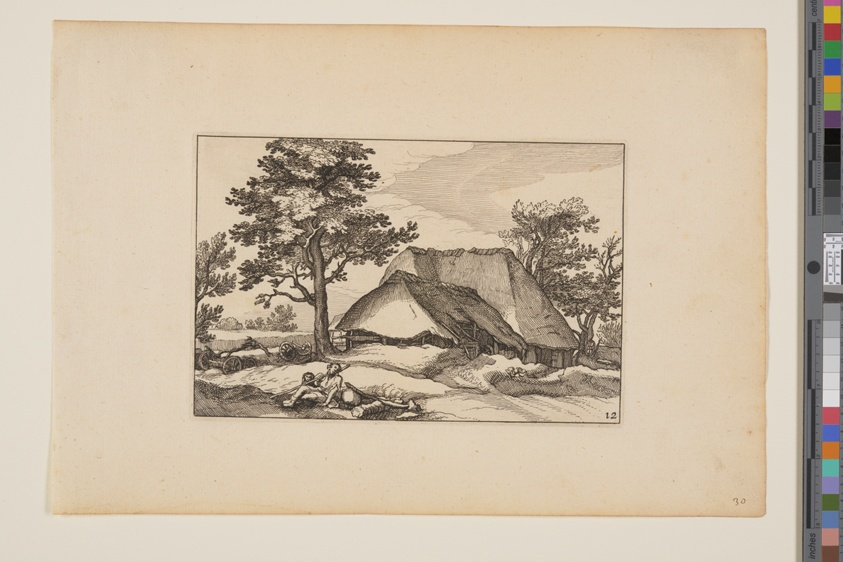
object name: Print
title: Barns, Resting Herd and Dog in Centre Foreground, from Landscapes (Verscheyden aerdige Lanthuysen...)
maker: Claes Jansz. Visscher (Netherlandish, c. 1550–c. 1612); after Abraham Bloemaert (Dutch, 1566–1651)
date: 1620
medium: Etching on ivory laid paper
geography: Netherlands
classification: print; paper; prints and drawing; etching